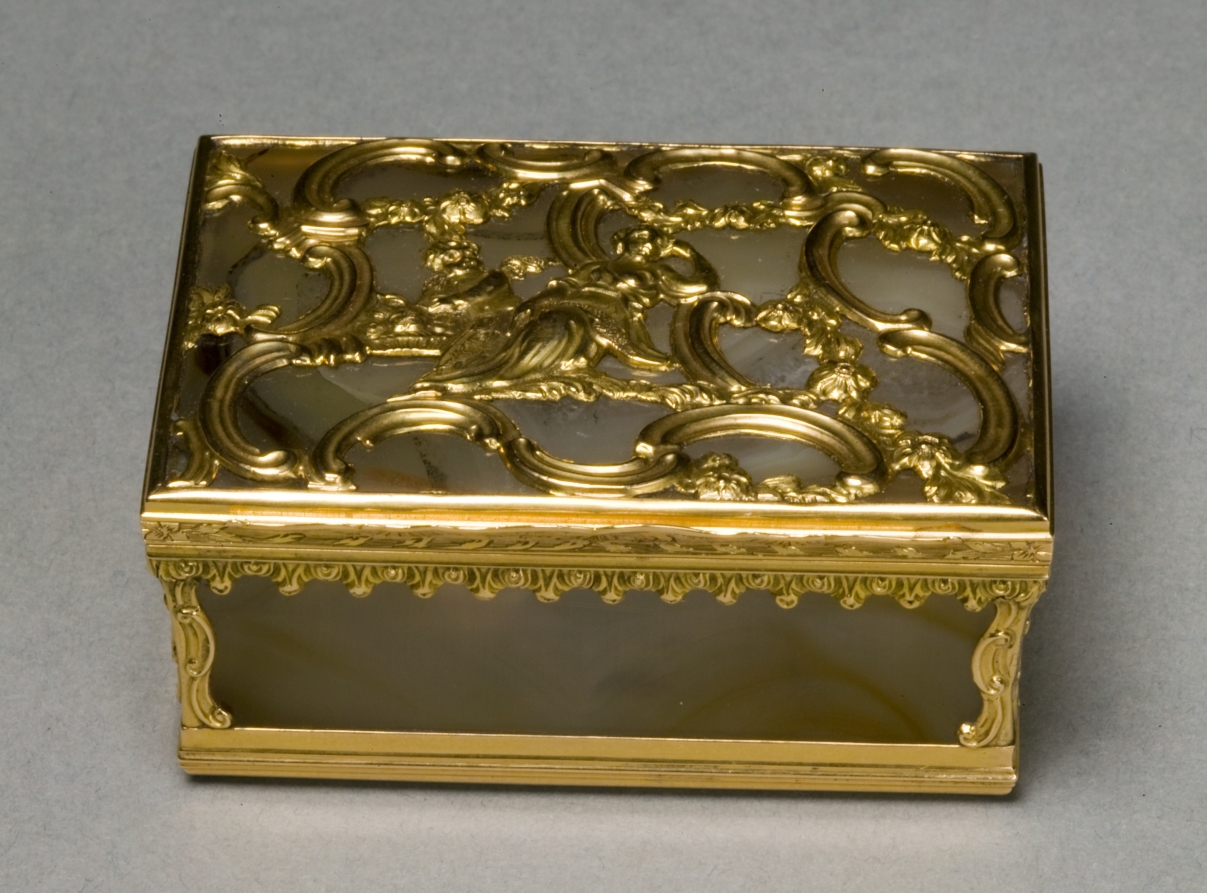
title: Snuff Box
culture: England, London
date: c. 1750–60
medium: agate and gold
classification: Miscellaneous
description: Luxurious personal objects, like this snuff box, were an essential part of a privileged wardrobe during the 1700s and early 1800s, emphasizing their owner’s refinement and wealth. Their glittering surfaces, however, disguised a system based on the labor and suffering of enslaved or indentured people, whether in gold or stone mines, tobacco farms, or shops where these goods were made. Like cotton, sugar, and tea, snuff came from British colonies in America, India, and the Caribbean, where enslaved people were exploited to grow these crops under extremely harsh conditions. Slavery was not abolished in much of the British Empire until 1833. Britain and other European nations continued to pursue colonialism with a sense of superiority that found its way into all aspects of life, including decorative objects glorifying their conquests.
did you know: This small, elaborate box held snuff, a form of powdered tobacco that was inhaled in tiny amounts.